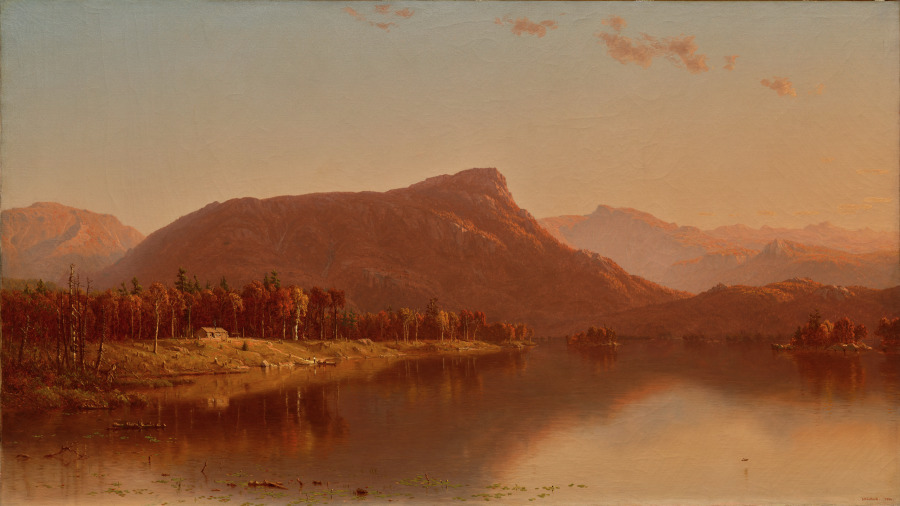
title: A Home in the Wilderness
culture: America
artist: Sanford Robinson Gifford (American, 1823–1880)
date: 1866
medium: oil on canvas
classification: Painting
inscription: Signed lower right: SR Gifford. 1866.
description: Gifford’s view of Mount Hayes in New Hampshire records human intrusion into a remote landscape. On the left riverbank a log cabin stands amid a recently cleared patch of land with several tree stumps, while figures in its doorway greet a man who has arrived with a canoe of supplies.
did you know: Gifford considered this painting to be one of his finest creations.